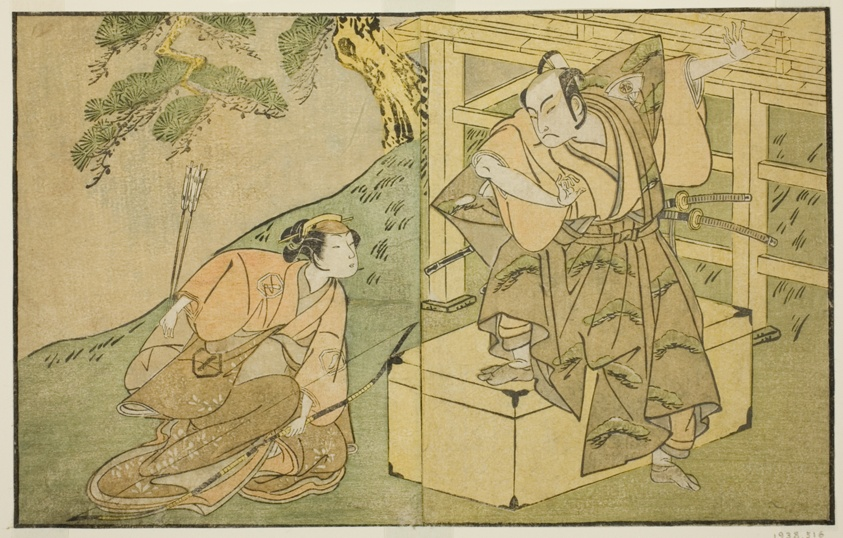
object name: Print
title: The Actors Onoe Matsusuke I as Akaboshi Taro (right), and Azuma Tozo II as Shirotae (left), in the Play Kono Hana Yotsugi no Hachi no Ki, Performed at the Ichimura Theater in the Eleventh Month, 1771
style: Japanese (culture or style)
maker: Katsukawa Shunsho 勝川 春章; Japanese, 1726-1792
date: c. 1772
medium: Color woodblock print; from the illustrated book Yakusha Kuni no Hana (Prominent Actors of Japan)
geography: Japan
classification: woodblock print; print; asian art